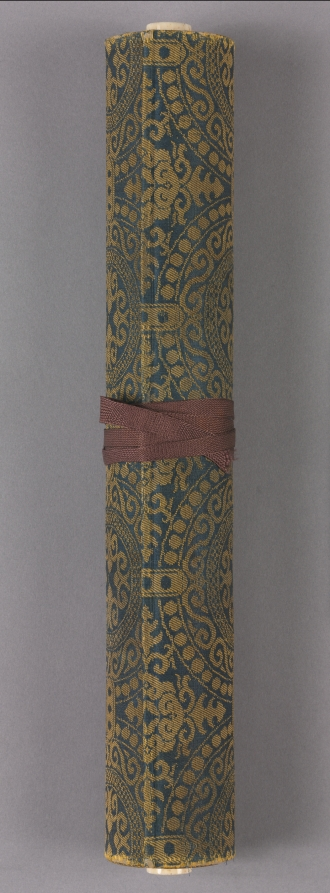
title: Selections from the Collection of Japanese Poems from Ancient and Modern Times (Kokin wakashū) with Design of Pines Along the Shore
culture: Japan, Momoyama period (1573-1615) to Edo period (1615-1858)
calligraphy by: Hon'ami Kōetsu (Japanese, 1558–1637)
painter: attributed to Tawaraya Sōtatsu (Japanese, c. 1570–c. 1640)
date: 1600s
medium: handscroll; ink on silk with gold and silver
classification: Calligraphy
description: The calligrapher and craftsman Hon’ami Kōetsu frequently collaborated with Tawaraya Sōtatsu, a painter who ran a studio that produced fans and screens. Sōtatsu’s work featured abstracted and flattened shapes, fields of color and gold, and asymmetry. In particular, motifs that appeared in small scale, such as flora and fauna, in early decorated Japanese papers were painted in a larger scale—blown up as if seen under a magnifying glass. For this handscroll, Kōetsu brushed poems from the autumn section of a poetry anthology onto silk with a landscape of pines in gold and silver likely painted by Sōtatsu.